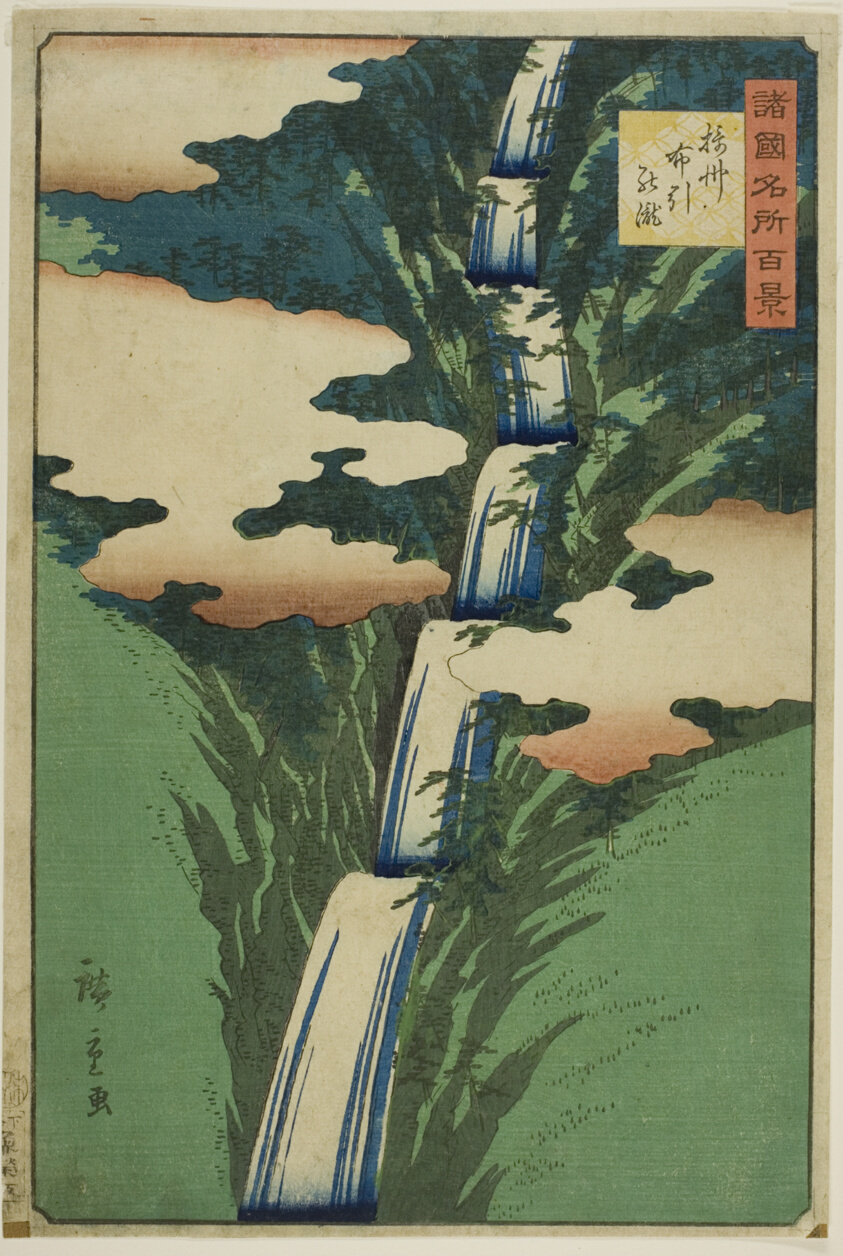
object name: Print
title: The Nunobiki Waterfall, Sesshu Province (Sesshu Nunobiki no taki), from the series “One Hundred Famous Views in the Various Provinces (Shokoku meisho hyakkei)”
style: Japanese (culture or style)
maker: Utagawa Hiroshige II (Shigenobu) (Japanese, 1826–1869)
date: 1859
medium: Color woodblock print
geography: Japan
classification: woodblock print; print